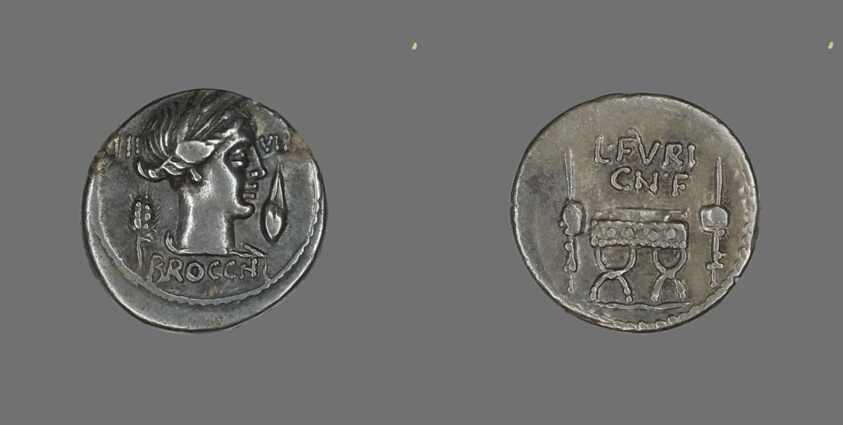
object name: Coin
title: Denarius (Coin) Depicting the Goddess Ceres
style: roman (ancient, style or period), ancient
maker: Roman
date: about 63 BCE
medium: Silver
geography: Roman Empire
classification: coin; ancient art